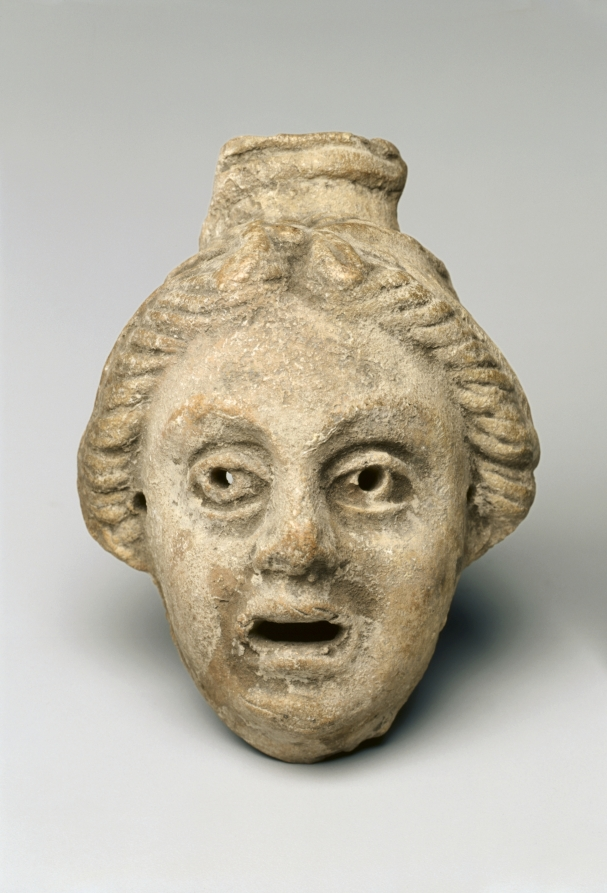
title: Mask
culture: Italy, Roman (?)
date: 1–100 CE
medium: terracotta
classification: Sculpture